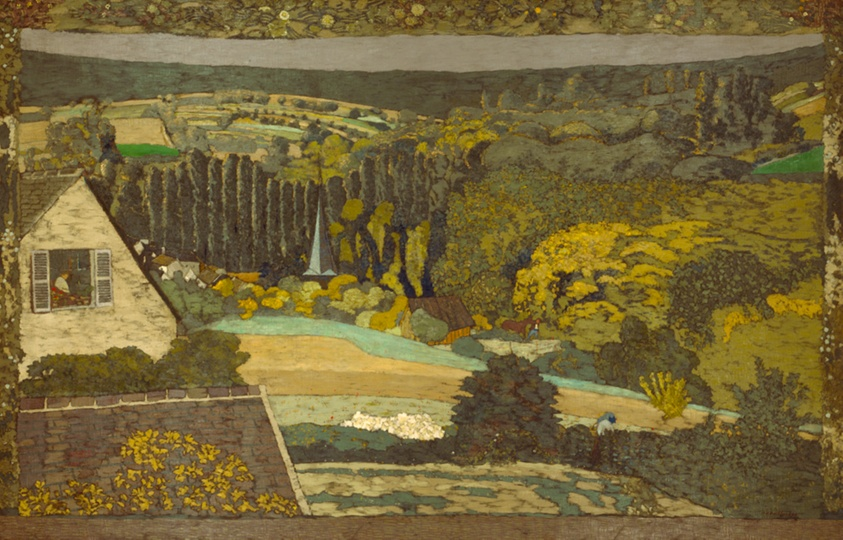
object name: Painting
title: Landscape: Window Overlooking the Woods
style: Post-Impressionism, nineteenth century, 19th century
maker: Édouard Vuillard (French, 1868-1940)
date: 1899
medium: Oil on canvas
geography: France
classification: painting; paint; oil paintings (visual works); oil on canvas; french; european painting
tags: landscapes, window, trees, people, landscape, forests, figures, farm, bushes, flowers, house, building, buildings, church, animals, horse, weather/seasons